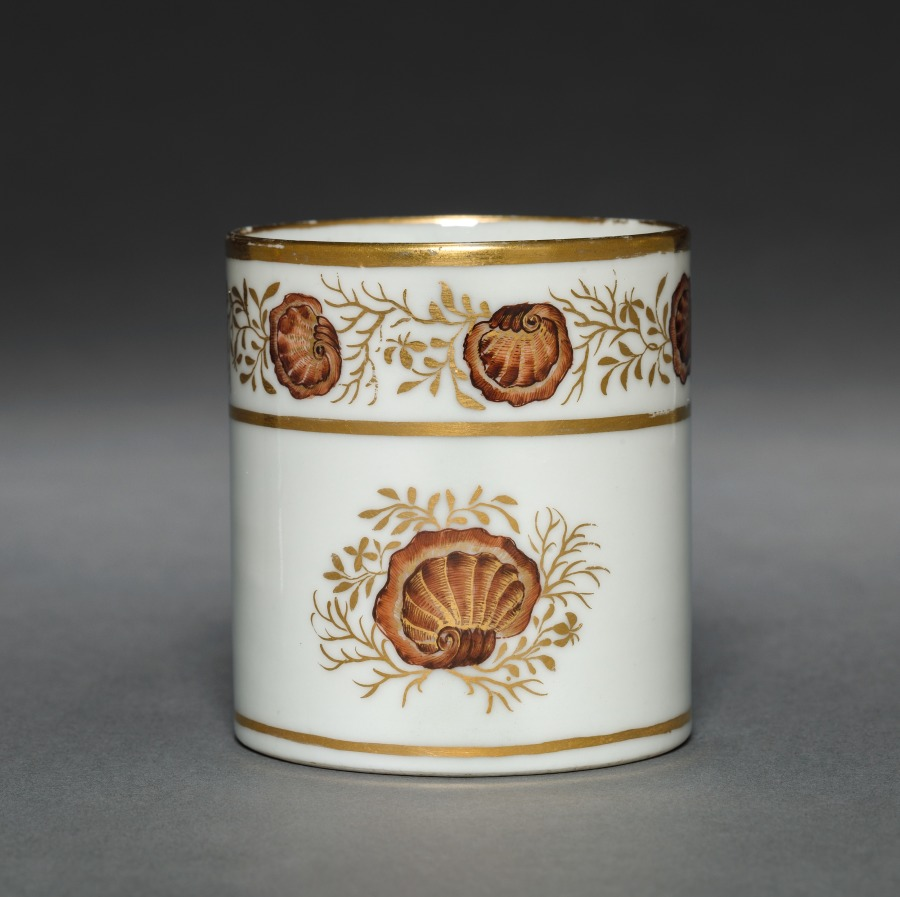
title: Cup from Oliver Wolcott, Jr. Tea Service (1 of 6)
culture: Chinese Export porcelain, late 18th-early 19th century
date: 1785–1805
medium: porcelain, sepia enamel, gold leaf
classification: Ceramic